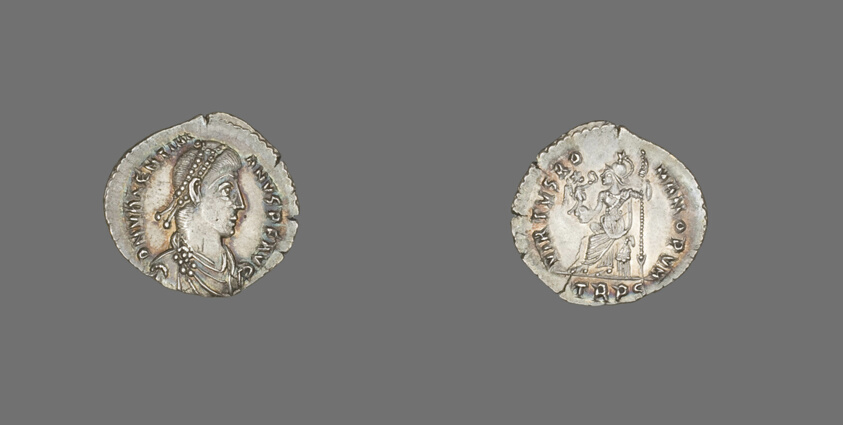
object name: Coin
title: Siliqua (Coin) Portraying Valentinian II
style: roman (ancient, style or period), ancient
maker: Roman, minted in Trier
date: 378-383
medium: Silver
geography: Trier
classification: coin; ancient art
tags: portrait